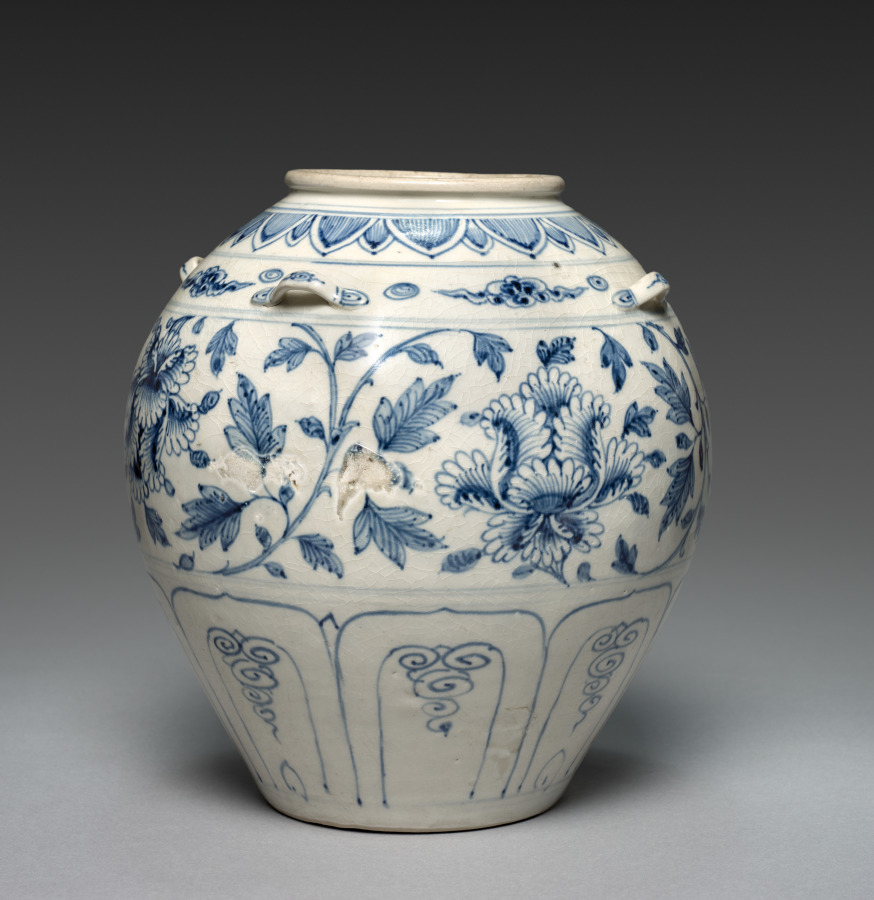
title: Storage Jar: Blue-and-White Ware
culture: Vietnam (Annam)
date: 1300s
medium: porcelain with underglaze blue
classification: Ceramic